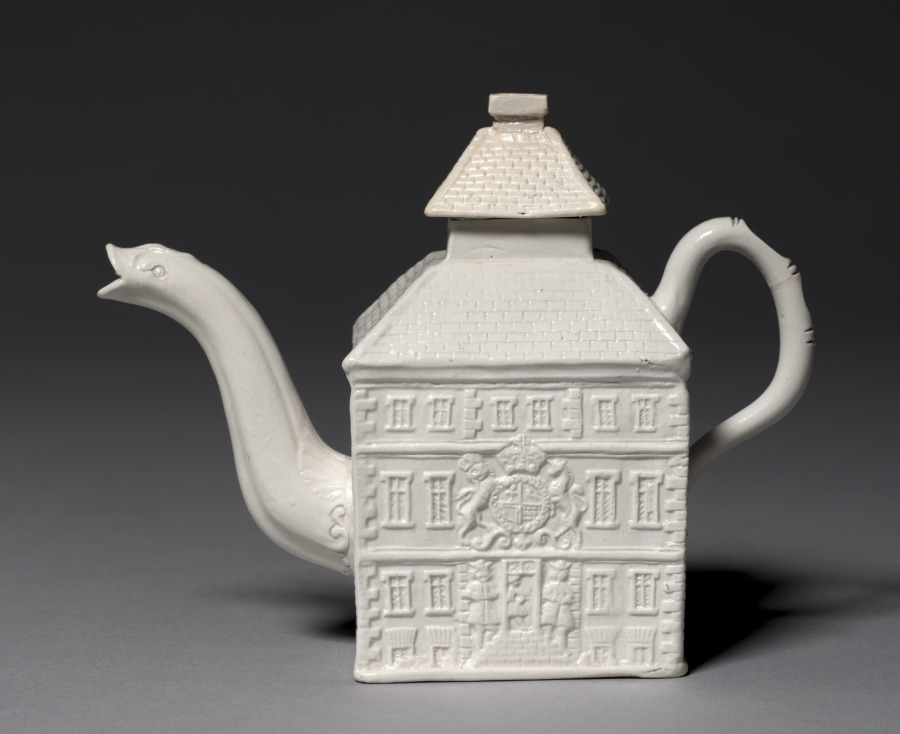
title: Teapot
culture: England, Staffordshire, 18th century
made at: Staffordshire Factory (British)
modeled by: Aaron Wood (British)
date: 1740–1750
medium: salt-glazed earthenware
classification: Ceramic